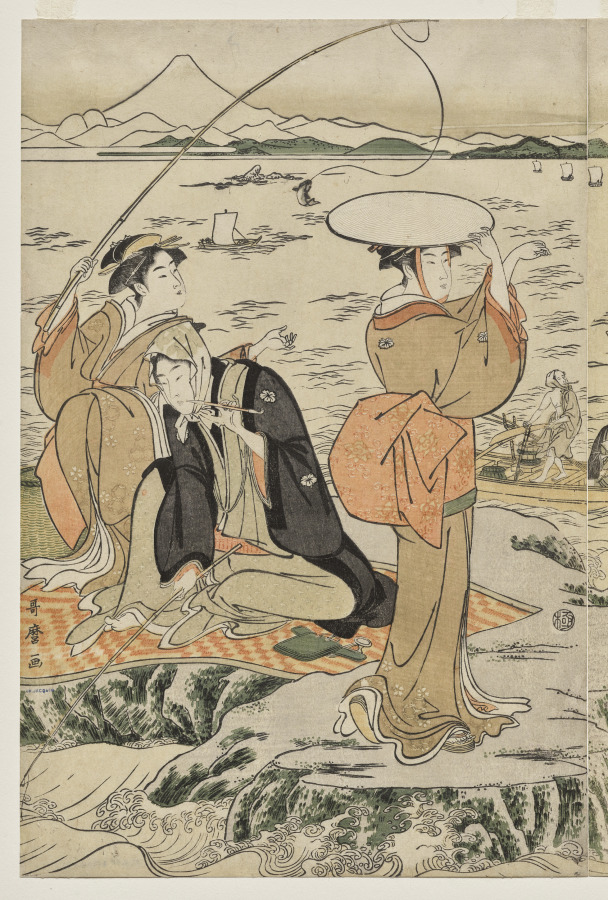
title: Fishing at Iwaya on Enoshima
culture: Japan, Edo period (1615–1868)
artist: Kitagawa Utamaro (Japanese, c. 1754–1806)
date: c. 1790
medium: color woodblock print from a triptych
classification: Print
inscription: Signature: Utamaro ga Censorship Seal: kiwame